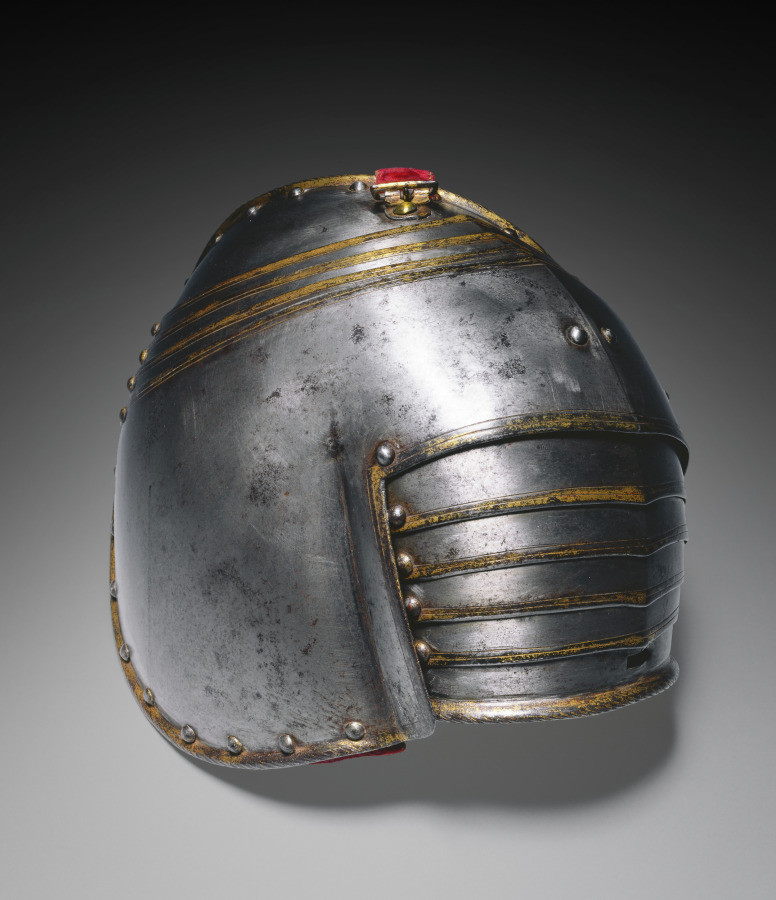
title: Pauldron for Right Shoulder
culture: Italy, 17th century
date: 1600s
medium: blued steel with gilt borders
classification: Arms and Armor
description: This element for the shoulder once belonged to a suit decorated by the bluing technique, a process of superheating armor plates to achieve a deep blue color. Gilding the borders created additional contrast for a refined appearance.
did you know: Bluing required heating to at least 590 degrees Fahrenheit, the temperature at which oxidation occurs and turns the metal a deep shade of blue.